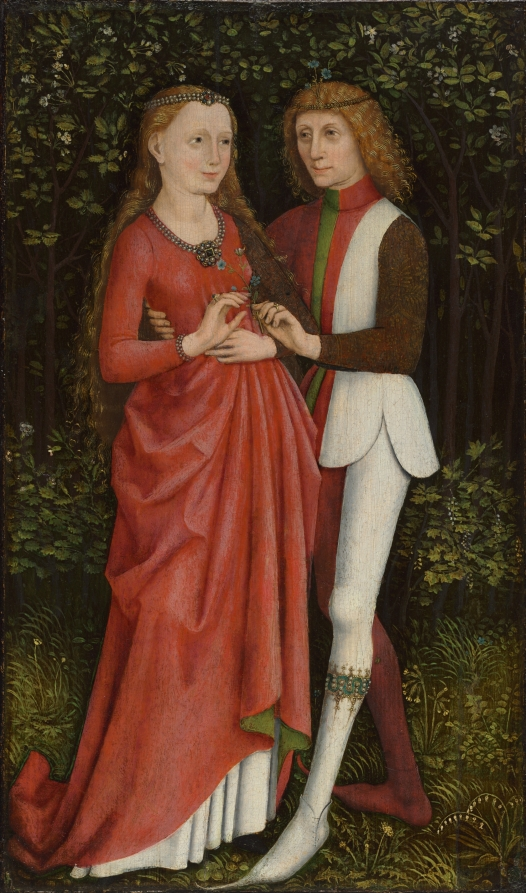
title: A Bridal Couple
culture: Southern Germany, 15th century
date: c. 1470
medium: oil on panel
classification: Painting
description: This painting depicting a recently married aristocratic couple is filled with symbolism. The various floral elements represent love and fertility, while the colors of their clothes suggest not only their relationship but also chastity, love, and modesty. What details might you choose to symbolize a young couple in love?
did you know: This painting inspired internationally renowned Finnish composer Kaija Saariaho to write a piece of music titled "Orion" after she visited the museum.